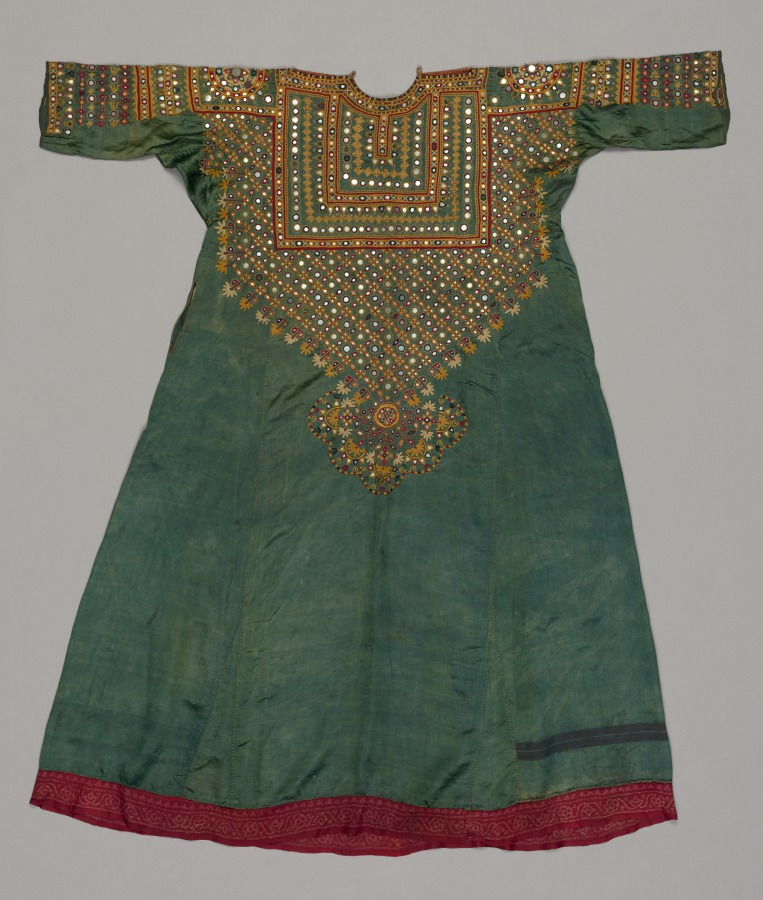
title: Woman's Dress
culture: Western India, Gujarat, Kachchh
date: 1800s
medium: silk thread on silk ground, embroidery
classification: Garment